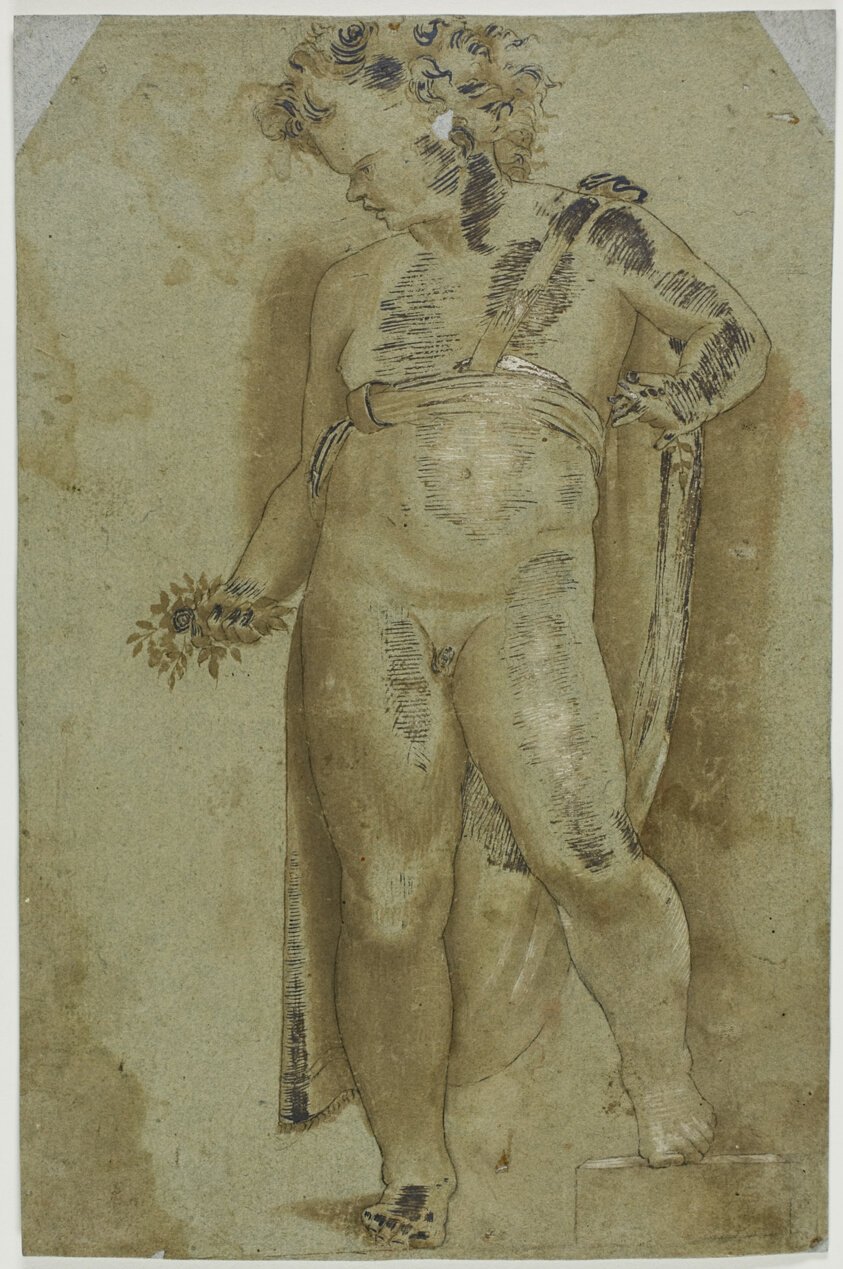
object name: Drawing and Watercolor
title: Putto Holding Flowers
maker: possibly after Pellegrino Tibaldi; Italian, 1527-1596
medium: Pen and brown ink, with brush and brown wash, heightened with lead white (discolored), on blue laid paper, laid down on blue wove paper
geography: Italy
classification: ink with wash; drawings (visual works); prints and drawing